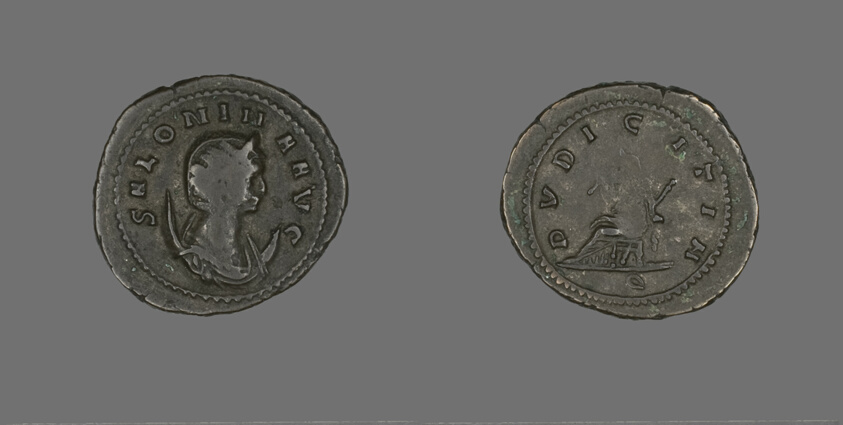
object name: Coin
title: Coin Portraying Empress Salonina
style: imperial (roman), ancient, roman (ancient, style or period)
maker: Roman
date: 256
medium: Bronze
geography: Roman Empire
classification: coin; struck; ancient art